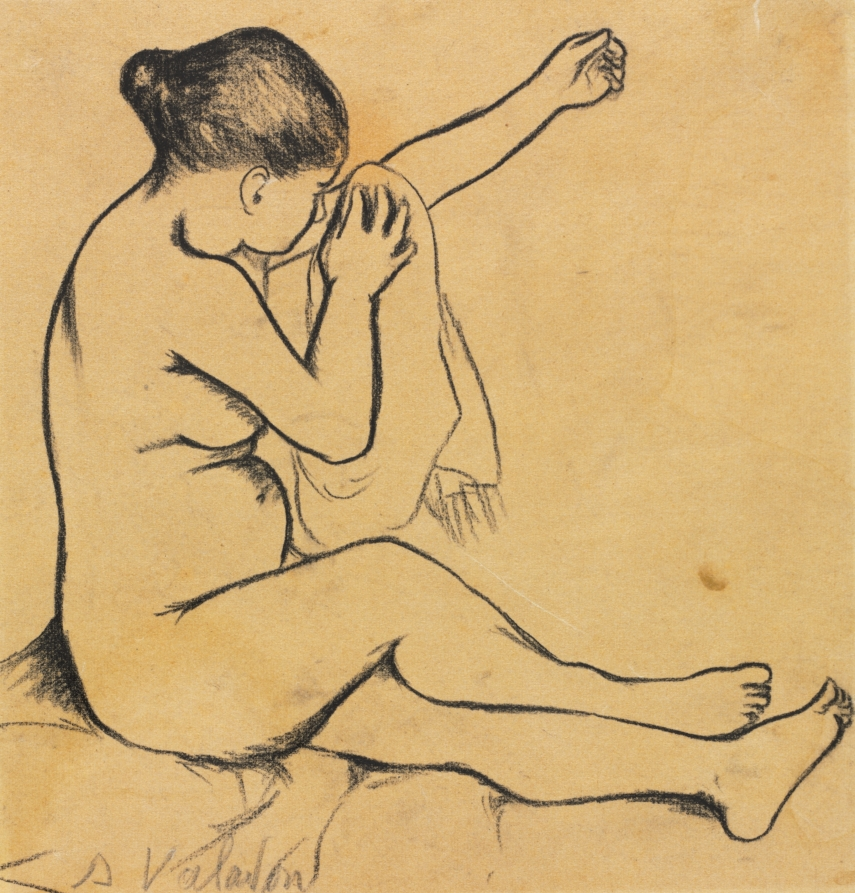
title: Seated Female Nude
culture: France, 20th century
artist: Suzanne Valadon (French, 1865–1938)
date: first third 1900s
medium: black crayon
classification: Drawing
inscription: signed, lower left, in graphite: S Valadon ; VERSO OF SECONDARY SUPPORT, upper right, in graphite: A